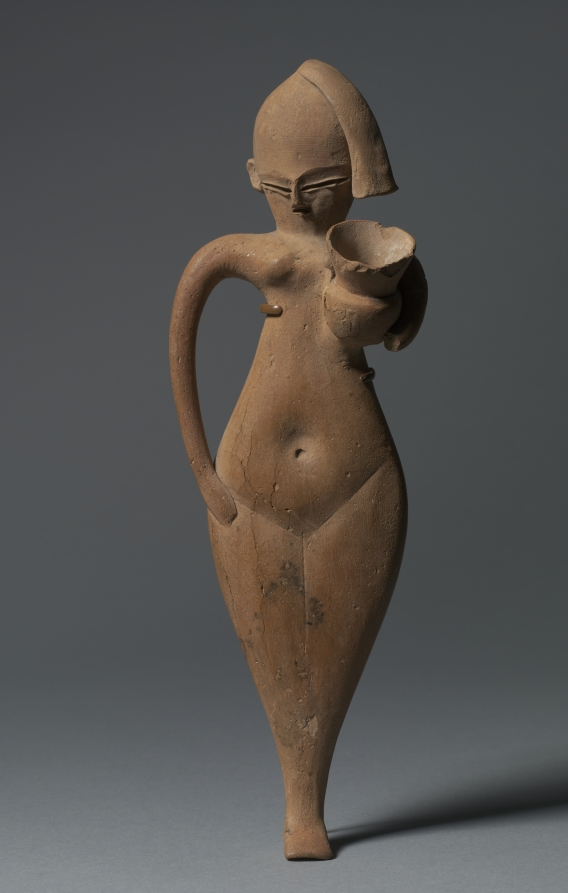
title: Statuette of a Serving Girl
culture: Egypt, New Kingdom (1540–1069 BCE), Dynasties 18–19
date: c. 1323–1186 BCE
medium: terracotta, originally painted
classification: Sculpture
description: This statuette of a young serving girl carrying a jar belongs to a select group of hand-modeled figurines usually dated to Dynasties 18 and 19. According to the conventions of Egyptian art, the girl's nudity and the sidelock of hair indicate her young age. No more than a dozen of these statuettes are known. Their distinctive features--slit-like eyes, exaggerated hips, triangular delineation of the legs, and finger-depression of the navel--suggest that all were made in the same workshop. Although their exact function remains unknown, it has been suggested that they magically served the deceased as an object in the tomb.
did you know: This statuette of a serving girl was likely intended to accompany the deceased in the afterlife.